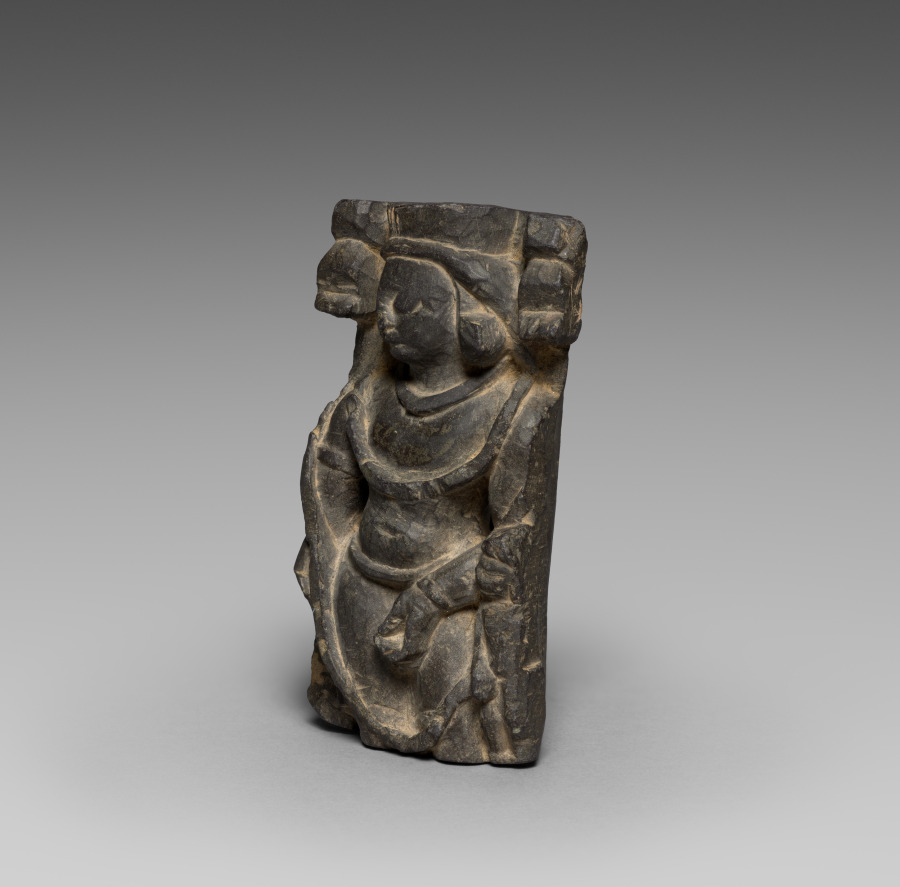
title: Male Figure, Possibly Indra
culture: Pakistan, Gandhara, possibly Swat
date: 300s–400s CE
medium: schist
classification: Sculpture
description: This carving appears to be unfinished, showing only the broad strokes of the male figure. The flat-topped crown is characteristic of Indra, which may be the identity of this figure.